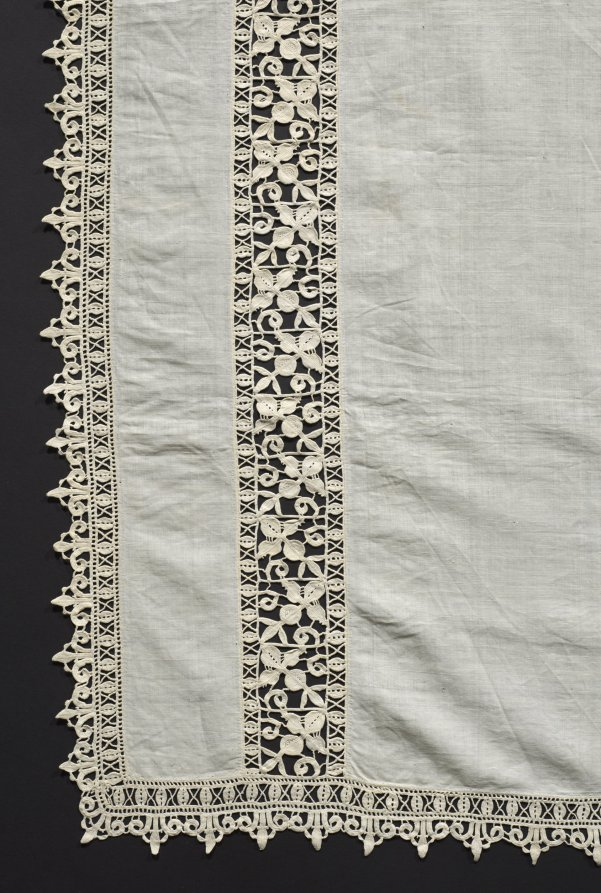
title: Cloth with Lace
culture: Italy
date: 1560–99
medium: Linen: needle lace (reticella and punto in aria)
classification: Lace